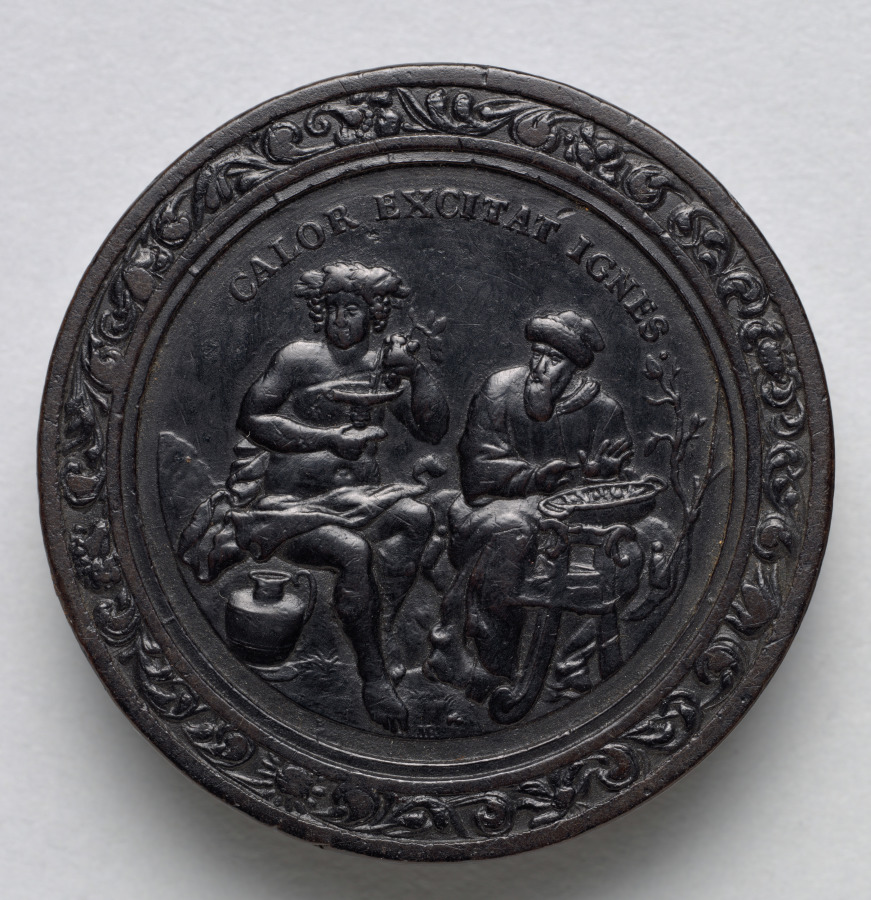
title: Gaming Piece (obverse)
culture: Germany, late 17th-early 18th Century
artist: Martin Brunner (German, 1659–1725)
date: c.1700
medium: wood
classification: Furniture and woodwork